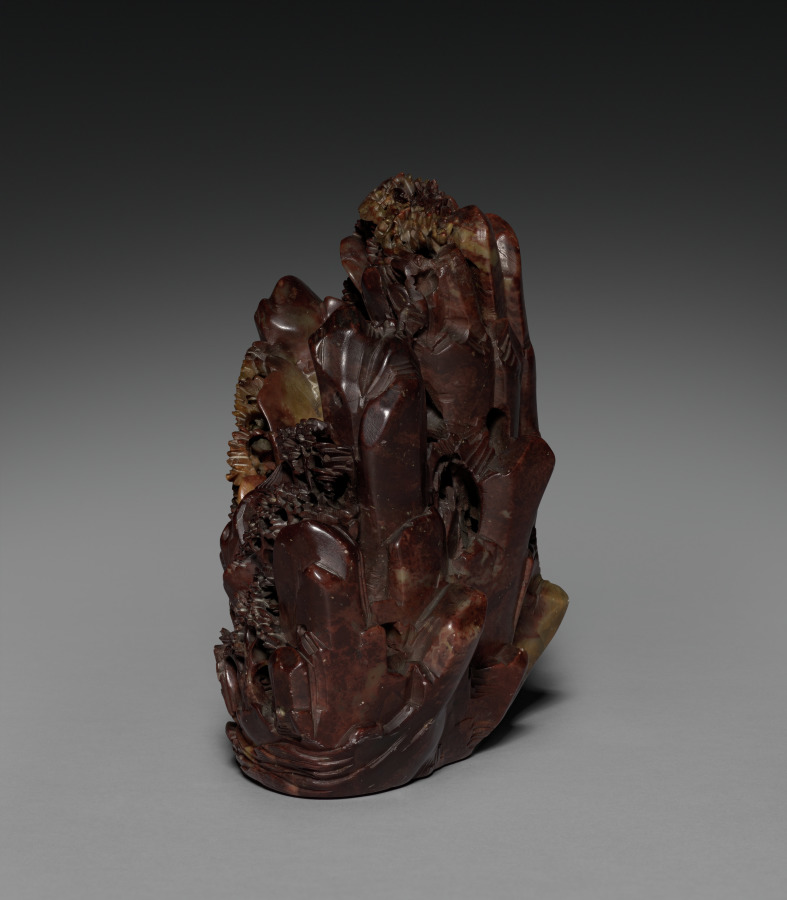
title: Landscape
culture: China, Qing dynasty (1644-1911)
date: 1644–1911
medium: soapstone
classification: Stone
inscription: 石門洞天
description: A mountain scenery surrounded by water and fish is meticulously carved out of soapstone, with a pond, bridge, waterfall, and temple front in its center. The unidentified figure scene on the left includes an ox and a man wearing what appears to be a Korean hat. A Buddha figure hidden in the depth of the temple can be glimpsed from the backside. The inscribed pillar on the right reads “Stonegate Cave to Heaven (shimen dongtian)”. Indentations all over the stone suggest that the miniature mountain was once adorned with precious stones and metal, presumably representing an earthly paradise to which one could escape in one’s mind and imagination.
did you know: A waterfall plummets down the cliff by the temple and then flows smoothly down to join the river at the front of the landscape scene.